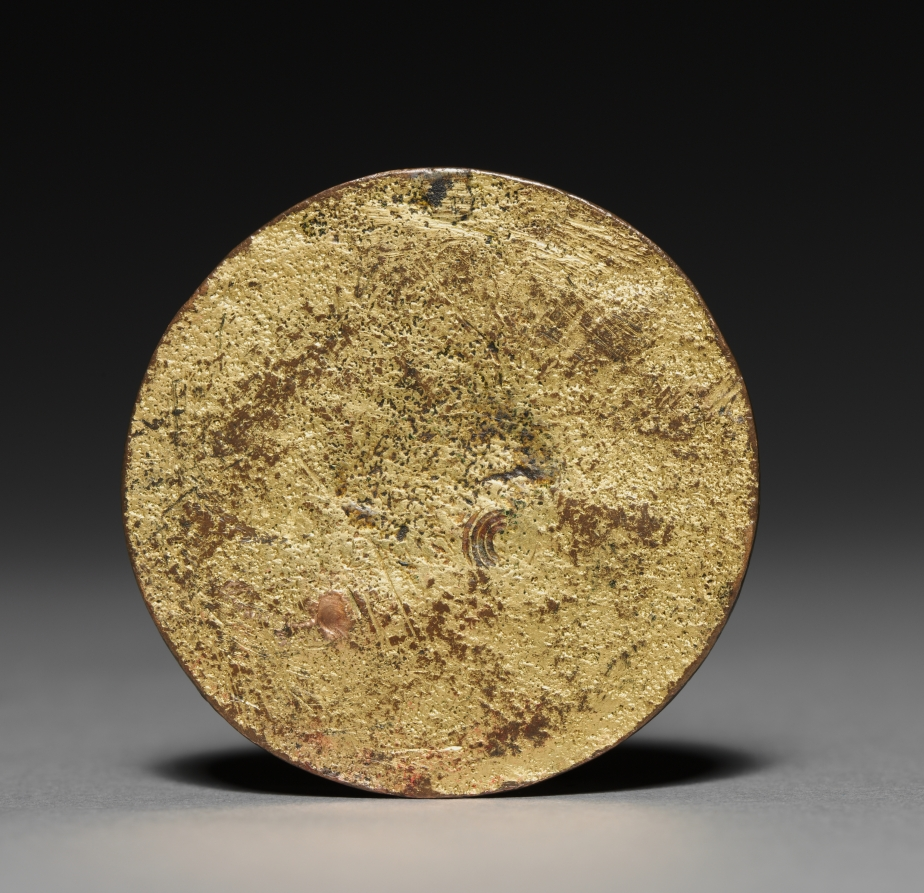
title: Saint Martin and the Beggar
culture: Germany, early 16th century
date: early 1500s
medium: gilt bronze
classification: Sculpture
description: This plate is an appliqué seal, intended as a decorative element for a garment or possibly as a simple pilgrimage medallion. The work tells a story of charity. It depicts Martin of Tours, a French soldier of the fourth century who, when accosted by a beggar at the gates of Amiens, cut a portion of his cloak and gave it to him. Saint Martin is depicted midway through cutting away his cloak with his saber. The bronze is often attributed to an artist in the northern Netherlands, which is due in part to the popularity of several motifs there at the turn of the sixteenth century. The depiction of plant life, for instance, is highly detailed, recalling Netherlandish scenes of the time. A similar seal (now in Berlin) belonged to Johann Potken, who was the provost of the Monastery of Saint Martin. This monastery was located in the now-German city of Emmerich am Rhein, not far from the Dutch city of Nijmegen. Despite the seal's Germanic attributes, the figures' physical qualities suggest the artist's awareness of Italian Renaissance art.